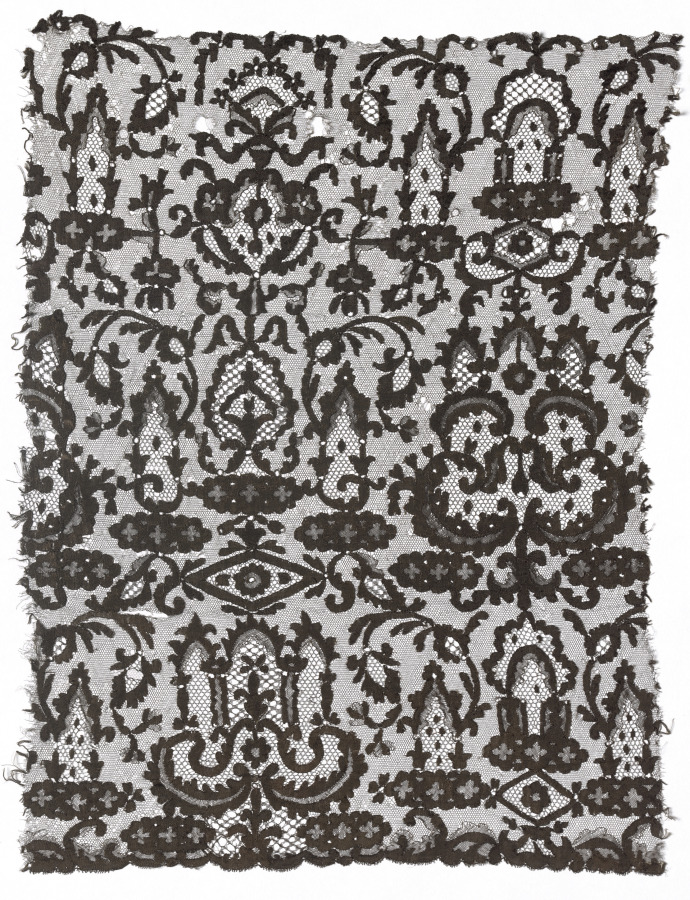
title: Lace Flounce Fragment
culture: Spain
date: 1800–1840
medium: Bobbin lace (Blonde Lace)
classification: Lace